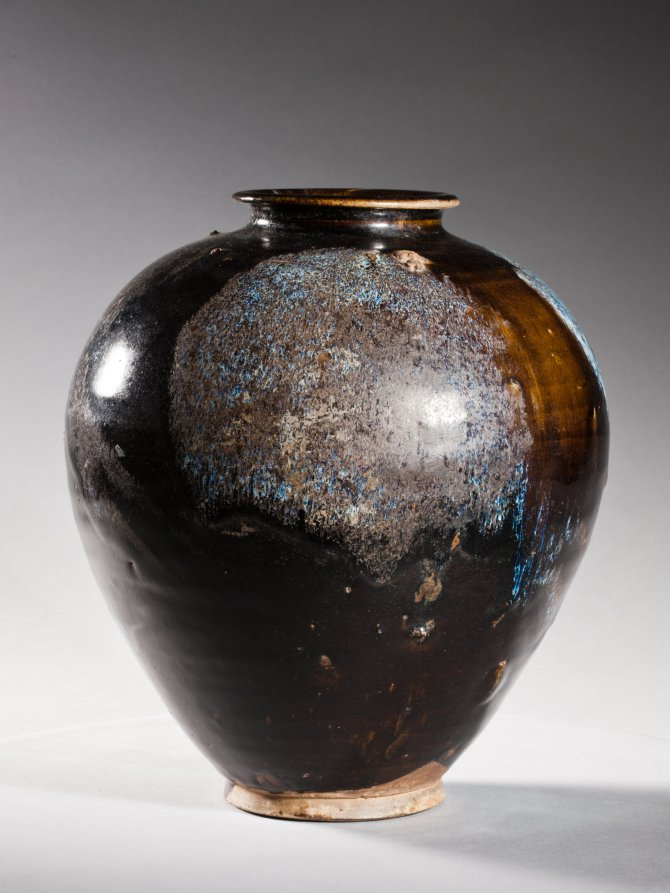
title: Jar: Black Ware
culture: China, Henan province, Huangdao kilns, Tang dynasty (618-907)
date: 700s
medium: glazed stoneware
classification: Ceramic